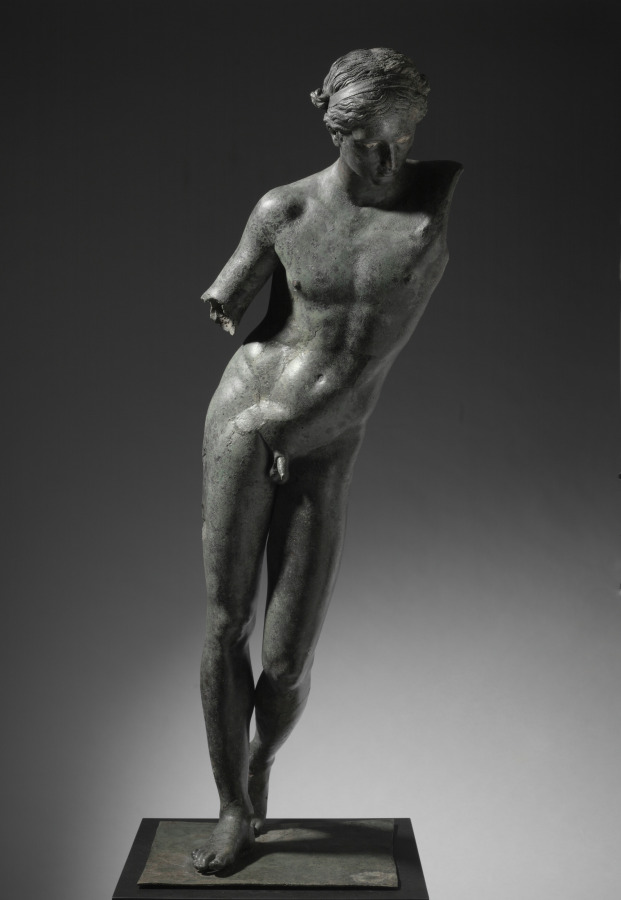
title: The Cleveland Apollo: Apollo Sauroktonos (Lizard-Slayer) or Apollo the Python-Slayer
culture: Greece, Athens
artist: attributed to Praxiteles (Greek, Athenian, c. 400–330 BCE)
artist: or Follower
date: c. 350–200 BCE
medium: bronze, copper and stone inlay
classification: Sculpture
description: The Cleveland Apollo was cast in multiple sections using the indirect lost-wax technique. First, molds were taken from a working model (now no longer known or preserved), which was then reproduced in hollow wax sections, each filled with a clay core. After details were added to the wax models, each was encased in clay. Then, the wax was heated, melted out, and replaced by molten bronze. Once cooled, the hollow bronze sections were fused together and finished, patching flaws and adding inlays and other details. Since the initial model was retained, it could be reused, allowing ancient sculptors to create multiples and variations of favorite works. Thus, remarkably, the Cleveland Apollo may once have been one of several such works. The consistently thin walls of the Cleveland Apollo (mostly 5-6 mm thick), together with the nearly invisible joins between most cast sections, show that it was created by highly skilled sculptors and foundry workers. Close looking reveals several noteworthy features. First, ovals atop the right foot mark a fusion weld, where molten bronze pooled to join separately cast sections. Second, small rectangular bronze patches cover parts of the surface (especially the right hip), each carefully cut and then hammered into place over holes or other casting defects. Inlaid lips, nipples, and eyes (the right ancient stone, the left now a modern replacement) added to the lifelike appearance of the sculpture, contrasting with the once bronze-colored skin. Finally, radiography helps to illuminate hidden features, such as the cast edge of the neck of Apollo.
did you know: Ovals across the top of the right foot show a clear join between separately cast sections.